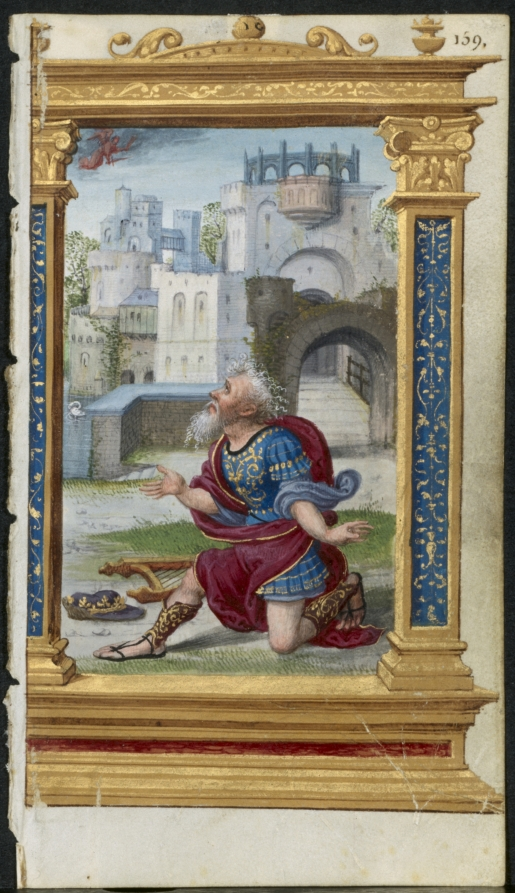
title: Leaf from a Book of Hours: King David in Prayer (2 of 3 Excised Leaves)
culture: France, 16th century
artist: Noël Bellemare (French, d. 1546)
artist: The 1520s Hours Workshop (French)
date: c. 1530–35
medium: ink, tempera and liquid gold on vellum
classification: Manuscript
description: The 1520s Hours Workshop produced luxury books of hours for a wealthy, often royal, clientele. Recent evidence points to Paris as the site of the workshop’s activity under the direction of Antwerp-born miniaturist Noël Bellemare (died 1546). Containing fuschia pinks and bright acid greens, the palette is unusual in French manuscript painting of the period. Instead, Bellemare’s miniatures point directly to Antwerp painting at the time.